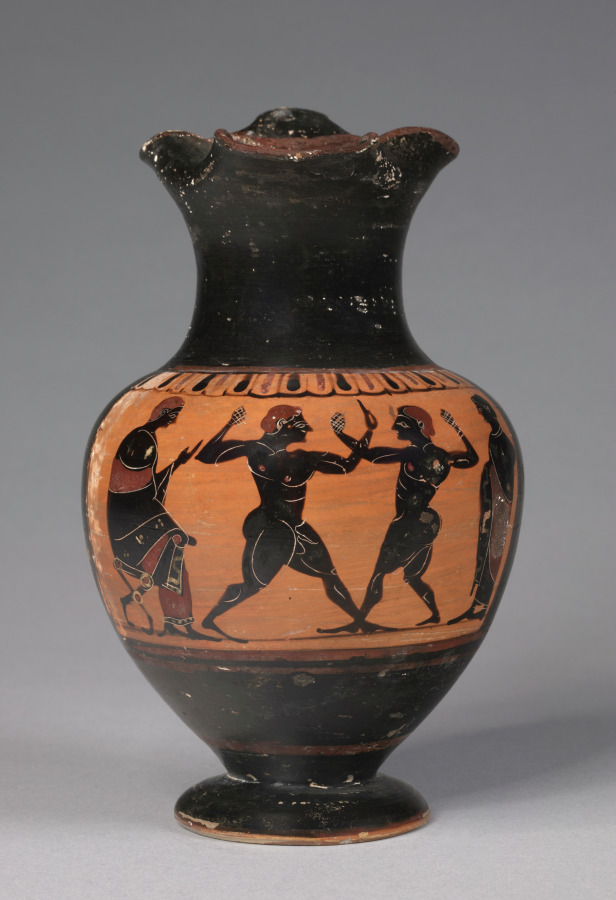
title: Black-Figure Oinochoe (Wine Jug): Boxers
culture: Greek, Attic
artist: attributed to Class of London B 524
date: c. 550–540 BCE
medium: ceramic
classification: Ceramic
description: Two stout young boxers, unbearded, face off on this small wine jug. Curiously, while one boxer has both hands wrapped for fighting (in leather straps known as himantes), the other has left one hand bare, holding it up to fend off punches. The seated figure at left, with one hand raised, may be a judge. The standing figure at right, whose white hair and beard are now mostly gone, is likely a spectator.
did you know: An ancient boxing match (or pyx) continued until one boxer could not (or would not) continue.